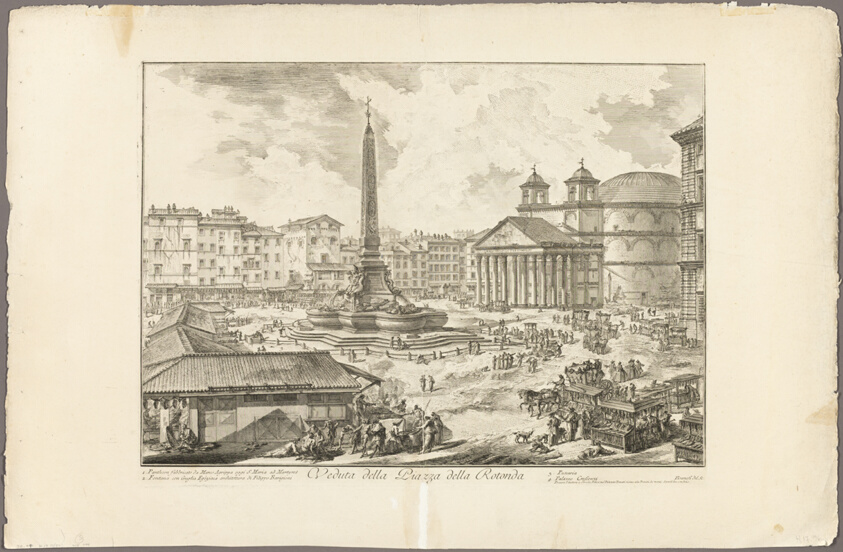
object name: Print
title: View of the Piazza della Rotonda, from Views of Rome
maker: Giovanni Battista Piranesi (Italian, 1720-1778)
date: 1750/59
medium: Etching on heavy ivory laid paper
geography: Italy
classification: etching; print; prints and drawing